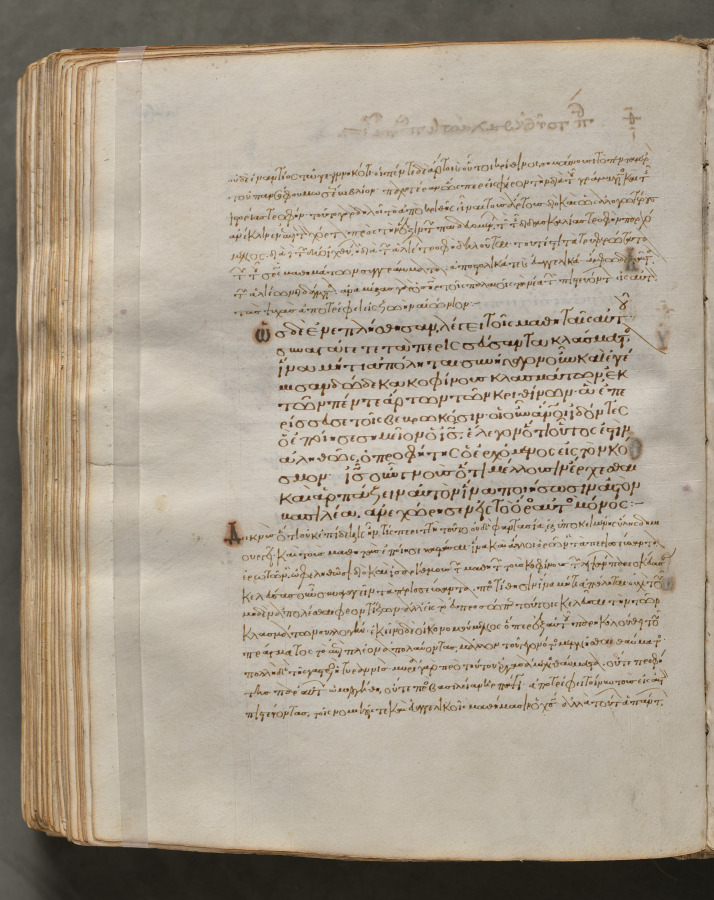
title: Text, folio 349 (verso), from a Gospel Book with Commentaries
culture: Byzantium, Constantinople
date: c. 1000–1100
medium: ink, tempera, and gold on vellum; leather binding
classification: Bound Volume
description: Each of the four gospels in this book opens on a page with brilliantly illuminated borders depicting the author of the text as well as birds—principally peacocks, symbols of the immortality of the soul—and fountains, representing the fountain of life and the salvation of the soul. This volume consists of 428 leaves with texts in Greek. Its level of sophistication suggests that it was probably written and decorated in a monastery in Constantinople.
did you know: Gospel books were carried in procession through Byzantine churches.